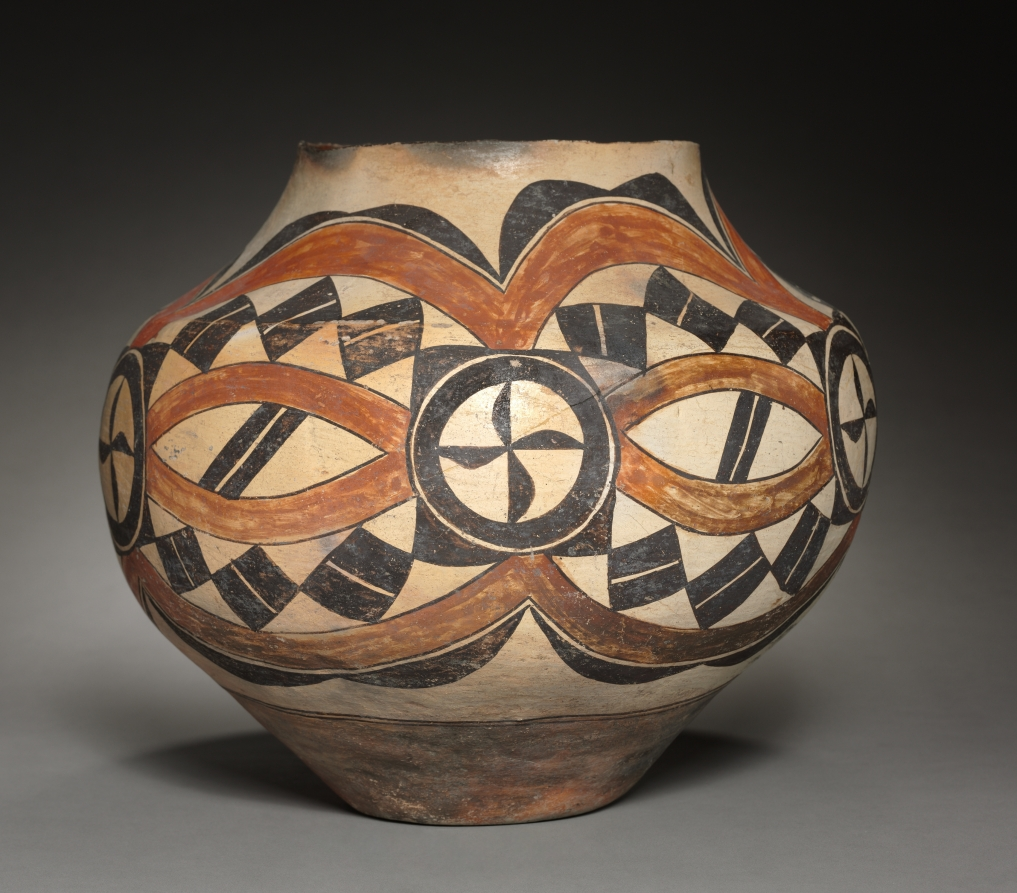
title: Jar (Olla)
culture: Southwest, Pueblo, Acoma, Laguna, Post- Contact Period,19th century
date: 1875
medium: pottery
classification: Ceramic